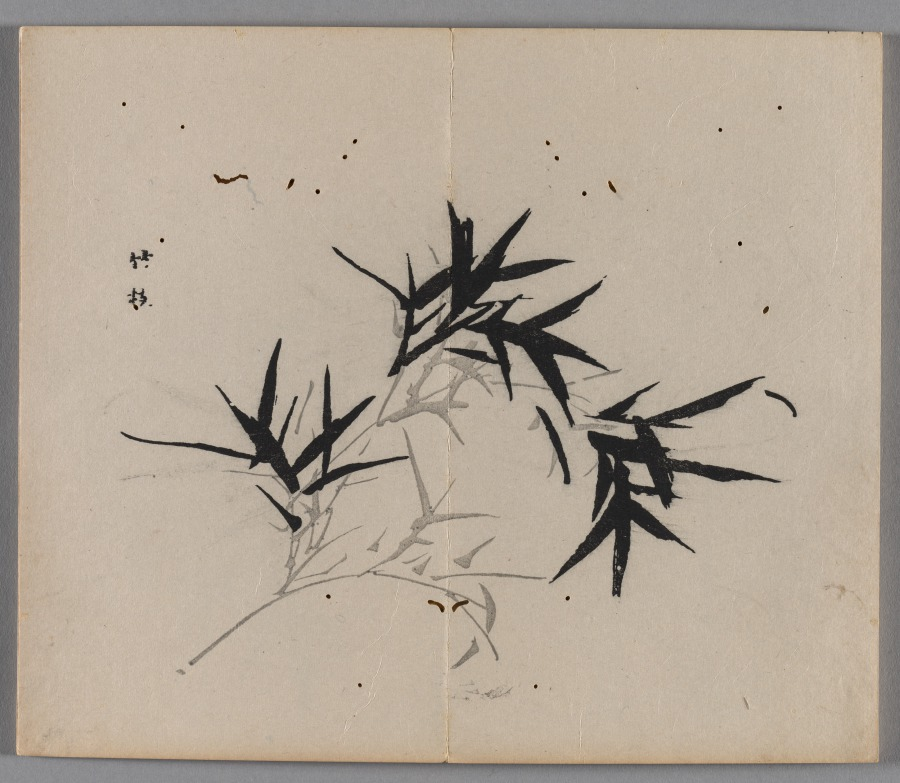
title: Ten Bamboo Studio Painting and Calligraphy Handbook (Shizhuzhai shuhua pu): Orchids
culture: China, Qing dynasty (1644-1911)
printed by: Hu Zhengyan (Chinese, c. 1584–1674)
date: 1633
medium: Woodblock-printed book; ink and colors on paper; first edition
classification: Print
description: Color printing reached a level of perfection in the early 1600s, as seen in this Ten Bamboo Studio Collection of Calligraphy and Painting and the Mustard Seed Garden Manual of Painting (printed 1679 and 1701). The painterly quality, precision in registering (aligning) the woodblocks, and harmonious colors made them the most successful color print editions in Chinese history. Both editions were printed and compiled in Nanjing, spread nationwide, and had a great impact on the arts in Japan and Korea.